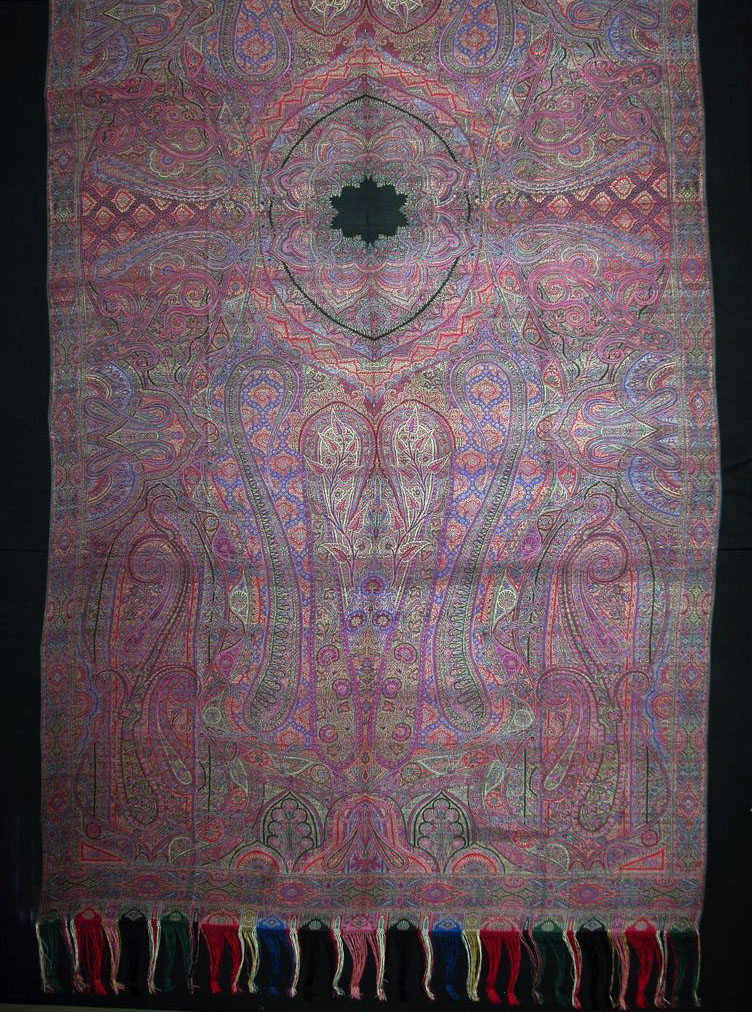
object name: Costume and Accessories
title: Shawl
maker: Produced by Clabburn, Sons and Crisp; England, Norwich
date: 1860s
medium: silk, twill weave with supplementary patterning wefts bound in twill interlacings; attached side borders; applied knotted fringe; woven on a loom with a Jacquard attachment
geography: Norwich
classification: textile; weaving; costume